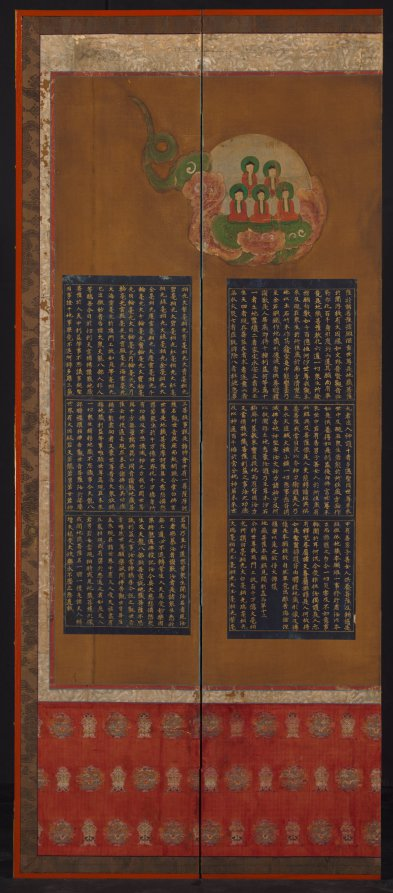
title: Buddhist Deities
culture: Korea, Joseon dynasty (1392–1910)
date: 1700s–1800s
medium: Four-panel folding screen; ink and color on silk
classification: Painting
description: This painting is a fragment of a much larger banner painting, now preserved by mounting on a four-panel continuous folding screen. On the back are Buddhist sutra pages, with text written in gold ink on indigo dyed paper.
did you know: This painting is a fragment of a much larger banner painting.